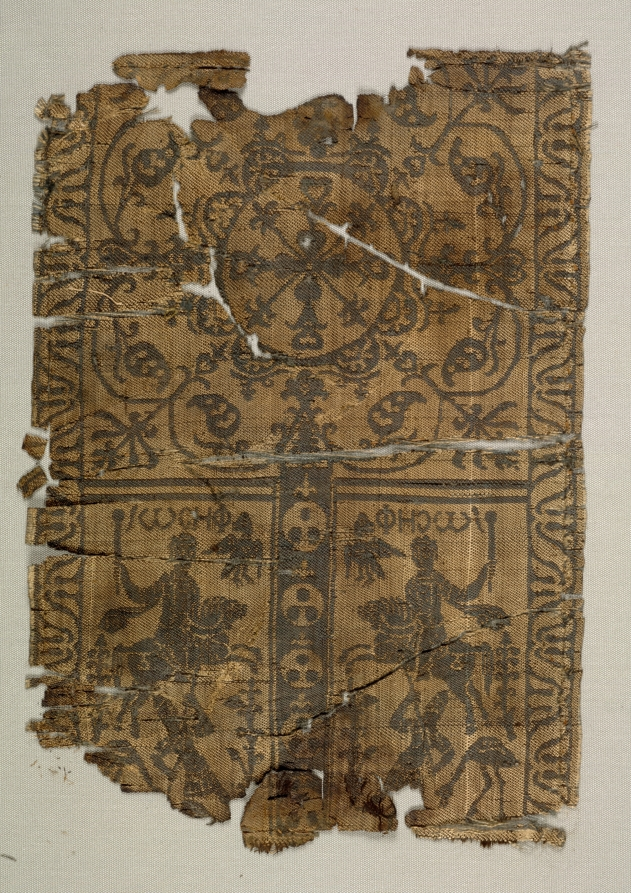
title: Silk Sleeve Decoration with Hunters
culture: Egypt or Syria, Umayyad period (661–750) or Abbasid period (750–1258)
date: 700s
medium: Silk: complementary weft-faced twill with inner warps (samit)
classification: Textile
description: This silk sleeve blends technical and stylistic elements that occurred in early Islamic art. The sides of the sleeve are decorated with a lotus flower design, an ancient Egyptian motif that was absorbed into Hellenistic and Byzantine art. The upper panel displays a large medallion composed of leaves and palmettes, common vegetal motifs in Islamic art of this period. Below, the mace-wielding horseman is identified in Coptic inscriptions as Joseph, father of Jesus and saint within the Coptic faith. The image is likely derived from the Byzantine representation of the victorious emperor.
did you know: At the bottom, men with spears hunt ostrich.